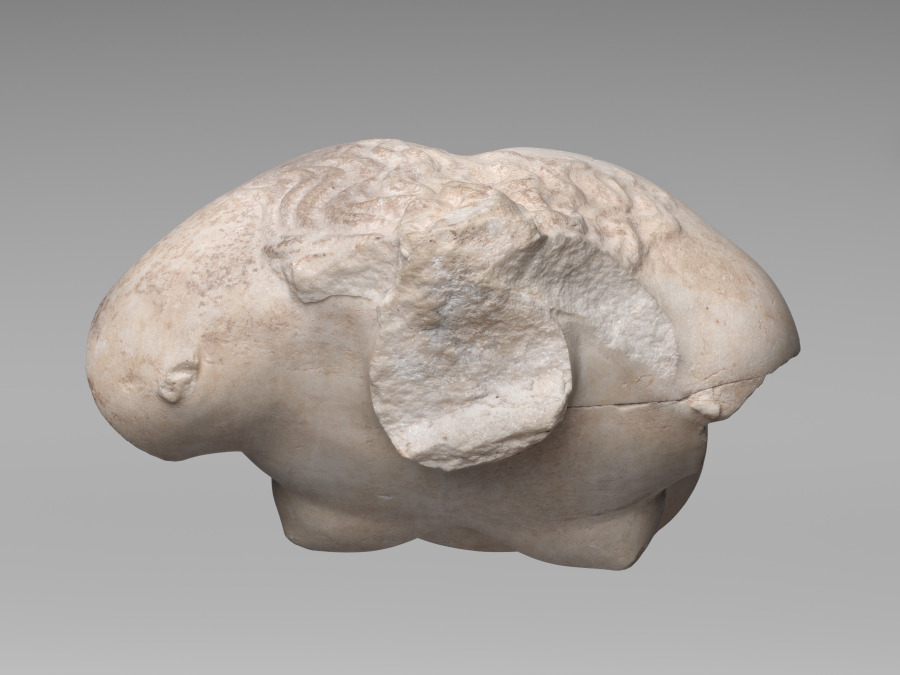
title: Aphrodite Torso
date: 200–1 BCE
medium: Thasian marble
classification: Sculpture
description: This torso can be identified through its nudity and pose as the Greek goddess of love, Aphrodite. Based on the now-lost Aphrodite of Knidos, a revolutionary marble sculpture created by Praxiteles of Athens in the mid-300s BCE, this sculpture belongs to a popular Greek and Roman type showing the goddess at her bath. With hips slightly shifted, she stood in a relaxed posture with most of her weight on one leg, probably with one hand modestly covering her pubic region and the other shielding her breasts or holding drapery. Alternatively, one or both hands may have tended to her wet hair, some of which falls over her neck and upper back.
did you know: This torso is based on the Aphrodite of Knidos, a Greek original by the master sculptor Praxiteles.